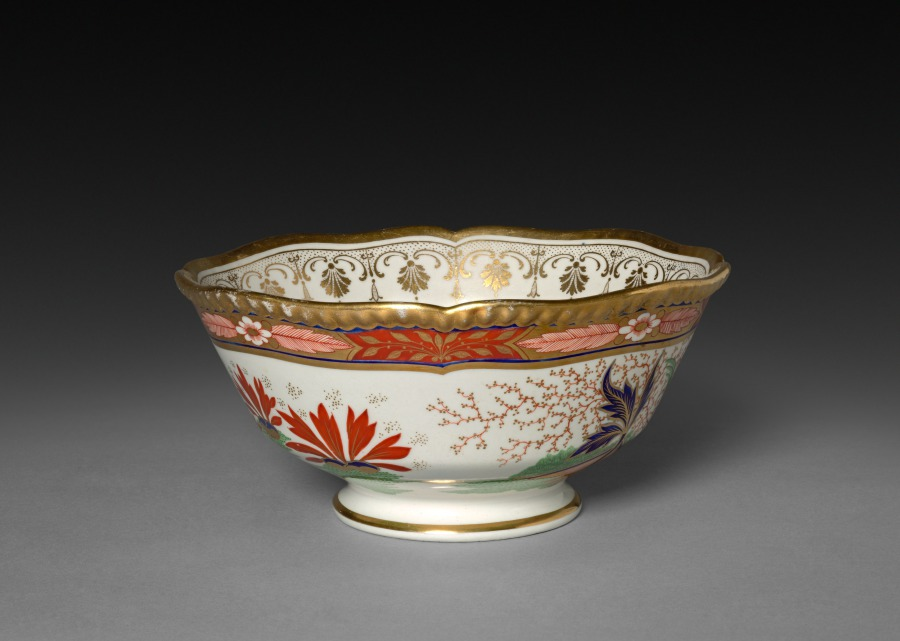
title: Bowl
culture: England, Derby, late 18th Century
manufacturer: Derby (Crown Derby Period) (British)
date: late 1700s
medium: porcelain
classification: Ceramic